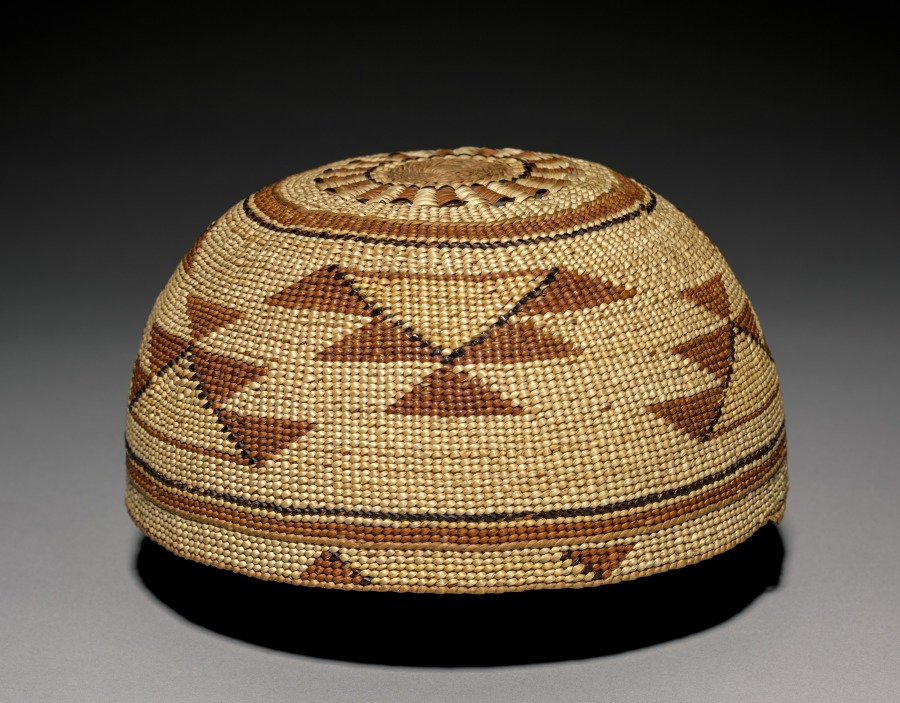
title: Hat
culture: California, late 19th- early 20th century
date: c 1875–1917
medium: plain-twined hazel with decoration in beargrass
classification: Basketry